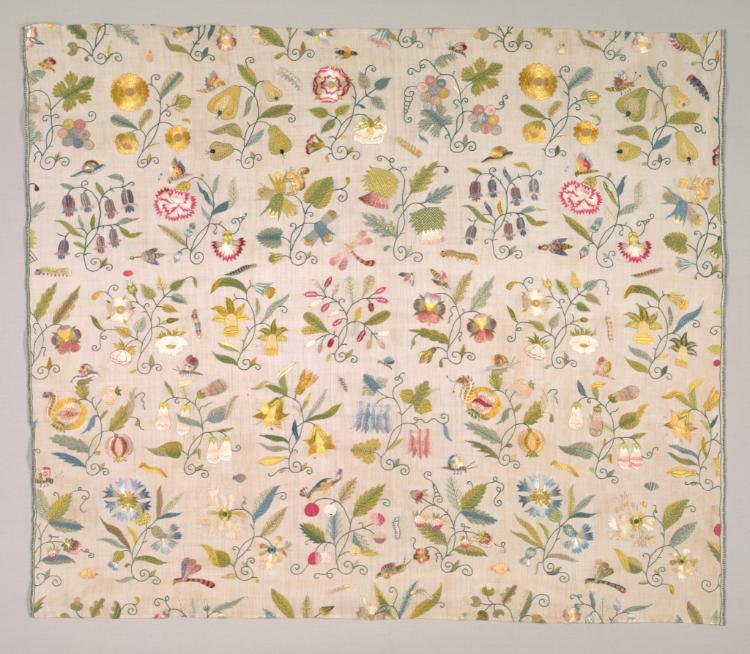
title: Floral Panel, Probably from a Curtain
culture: England, James I Period, early 17th century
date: early 1600s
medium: Silk, linen; plain weave, embroidery: couch and stem stitches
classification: Embroidery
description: Natural forms and brilliant colors of silk thread radiate in this embroidery. The refined floral sprays are offset in successive rows and repeated every sixth row. Flies, moths, and other insects are scattered among them, and a seated squirrel eats a hazelnut. The profusion of flowers and plants, such as thistles, hazelnuts, and foxgloves, were probably copied from pattern books that were increasingly available to embroiderers. Only a master embroiderer could have created such splendor evidenced here.